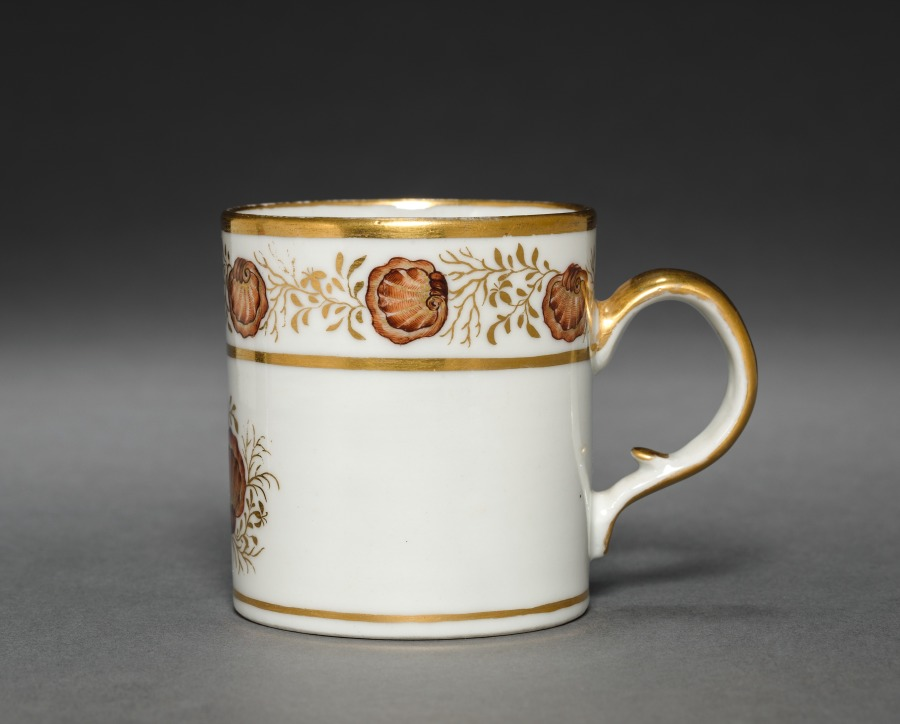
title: Cup from Oliver Wolcott, Jr. Tea Service (3 of 6)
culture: Chinese Export porcelain, late 18th-early 19th century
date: 1785–1805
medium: porcelain, sepia enamel, gold leaf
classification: Ceramic